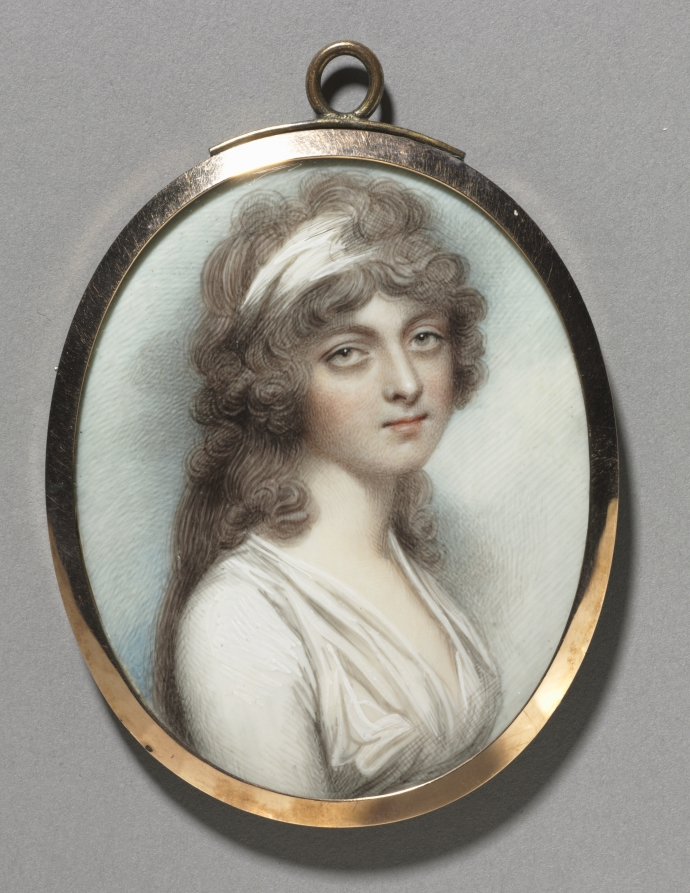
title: Portrait of Anna Walmesley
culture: England, 18th century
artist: Andrew Plimer (British, 1763–1837)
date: 1795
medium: watercolor on ivory in a gold frame with hair reverse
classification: Portrait Miniature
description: Sons of a clockmaker, Nathaniel Plimer and his younger brother Andrew initially trained in their father's profession, although they grew restless with this trade, and ran off to live with Gypsies for two years. By 1781, they were together in London, and determined to practice art. Both took up residence with established artists. Nathaniel worked as a servant to the enamelist Henry Bone, and Andrew became the valet to the portrait and miniature painter Richard Cosway. Cosway discovered Andrew copying one of his miniatures and introduced him to miniature painting. Andrew assimilated his master's airy execution and adapted Cosway's linear brushwork that leaves much of the bare ivory visible. He also employed Cosway's use of large, expressive eyes that made his miniatures appear soulfully elegant, earning him high praise among legions of admirers. A quick study, Andrew set up his own studio by 1786 and he exhibited regularly at the Royal Academy of Arts from 1786–1830. Andrew Plimer's works fall into two phases. In the first, his sitters appear more naturalistically rendered than those painted after around 1789. During the earlier period he frequently included his initials, "A.P.," on the front of the miniature, followed by a date. By contrast, he did not sign or date works in the second phase. Furthermore, in Andrew's second phase of work, he reduced his palette and, perhaps due to his high output, sitters share many visual characteristics; in particular, his women have elongated necks, long noses, and large appealing eyes.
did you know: Engraved on the top of the frame is the name Anna Walmesley, but because this was a common name, the museum has yet to discover any information about the sitter or to confirm her identity.